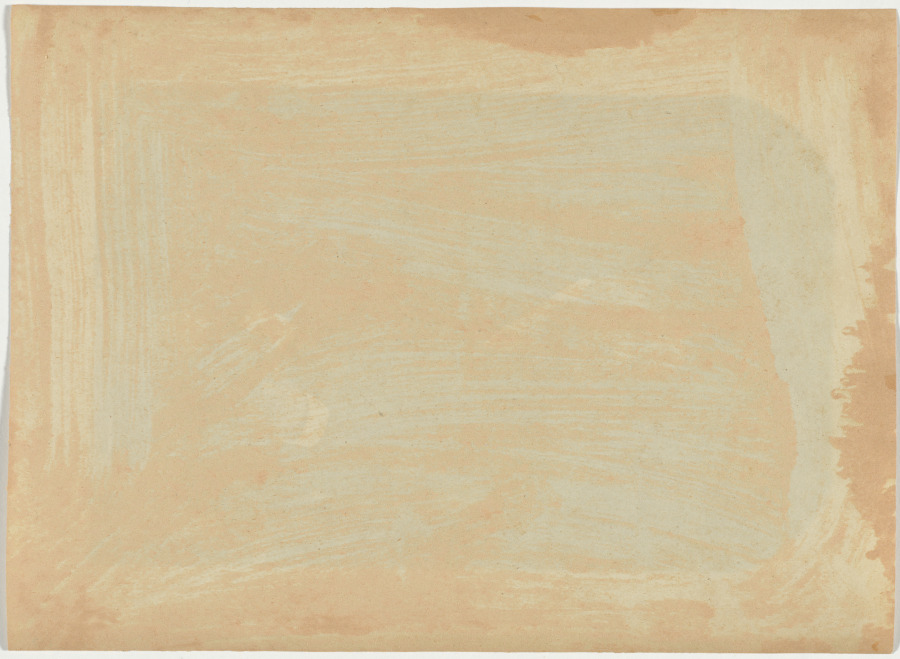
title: Portrait of a Gentleman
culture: India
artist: Raja Deen Dayal (Indian, 1844–1905)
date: 1887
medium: albumen print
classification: Photograph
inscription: No visible inscriptions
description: Two studio portraits of this sitter were included in the album; the other one was acquired by the Museum Rietberg in Zurich, Switzerland. Neither photograph was captioned, and the sitter remains unidentified. He almost certainly commissioned these two portraits and may be the person who ordered and chose the images for the album. Its owner would not need to label their own likeness. However, many who create albums do just that to ensure they are known to future generations of viewers.